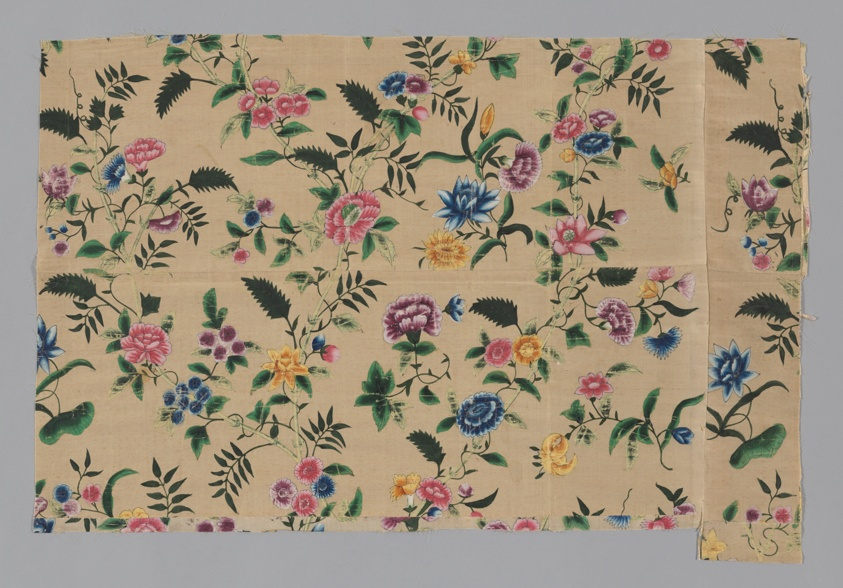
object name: Textile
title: Panel (Dress Fabric)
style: qing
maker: Made in China for the European/American market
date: 18th century, Qing dynasty (1644–1911)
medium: Silk, plain weave; painted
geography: China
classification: textile; weaving - printed; printed textile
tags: fashion